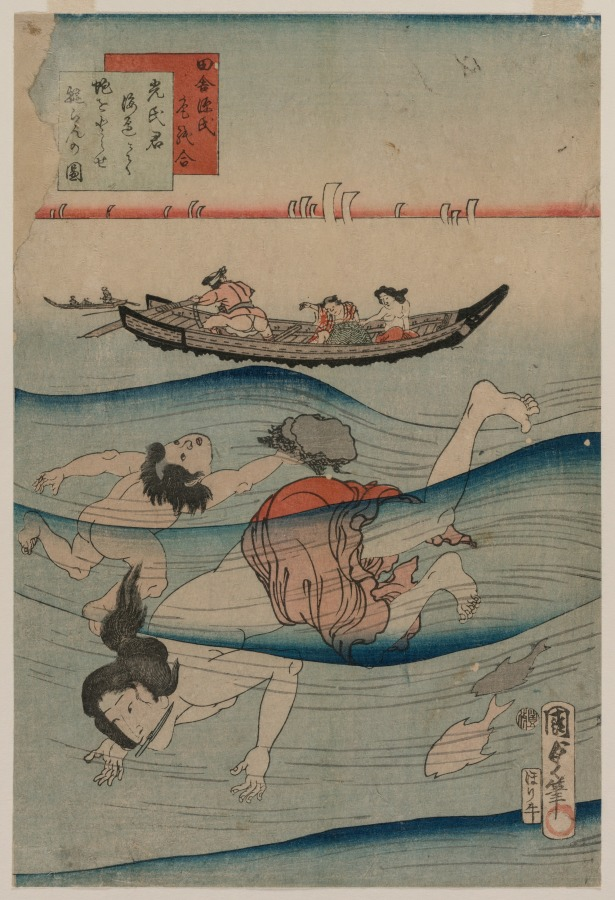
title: Rustic Genji's Poetry Contest: Mitsuuji's Excursion to the Seaside to See Abalone Diving (Inaka Genji shikishi awase, Mitsuuji umibe ni te awabi o torase yūran no zu)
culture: Japan, Edo period (1615–1868)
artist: Utagawa Kunisada II (Japanese, 1823–1880)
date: 1865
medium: One of a triptych of color woodblock prints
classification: Print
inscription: Signature: Kunisada II fude